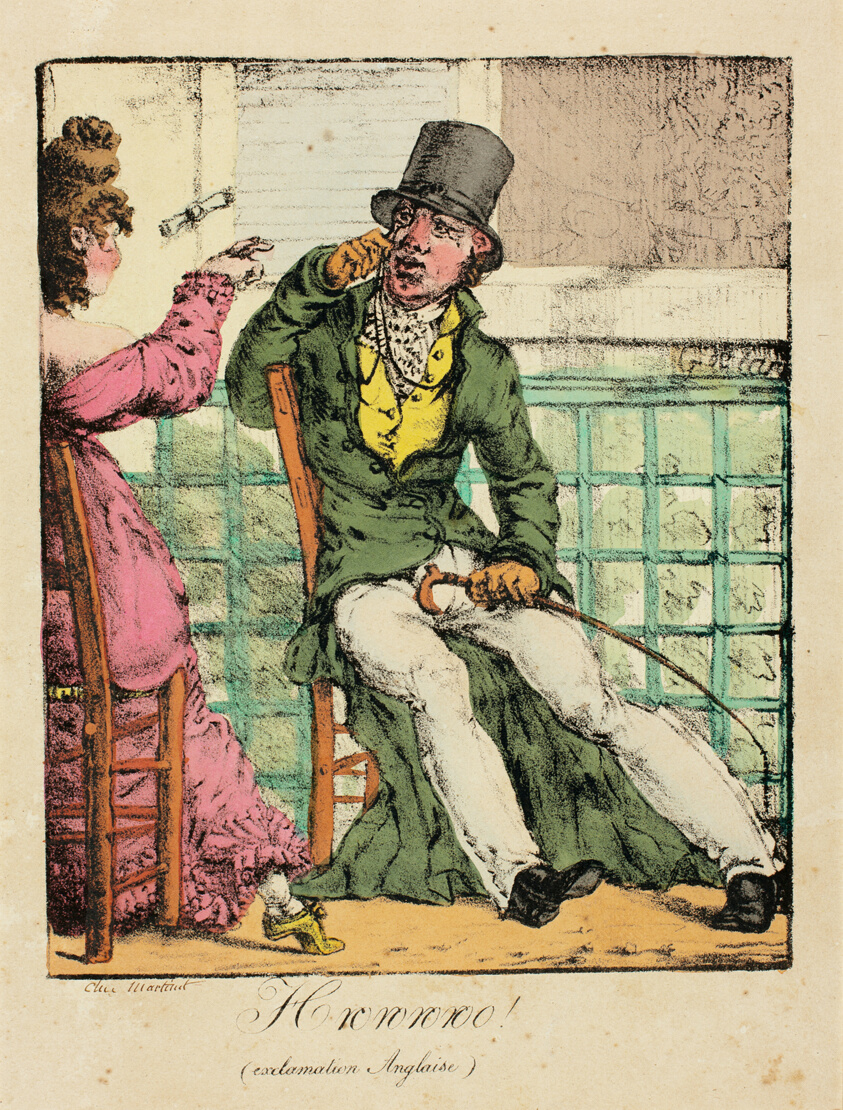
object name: Print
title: Hrorororoo! (English exclamation)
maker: Godissart de Cari (French, active 1817-1830); printed by Martinet, chez (French, 19th century)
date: 1817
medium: Color lithograph in black with hand-coloring on tan wove paper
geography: France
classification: lithograph; print; prints and drawing